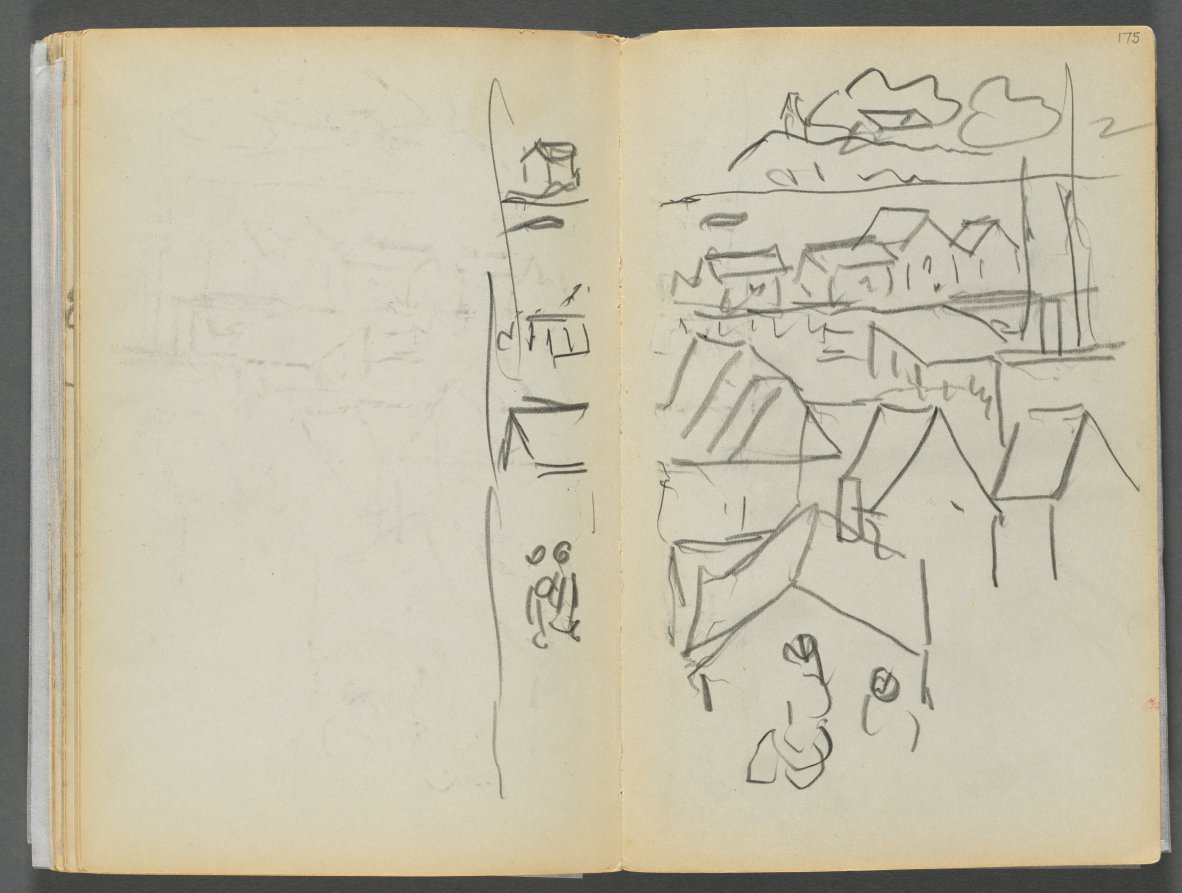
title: Sketchbook- The Granite Shore Hotel, Rockport, page 174 & 175: Houses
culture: America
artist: Maurice Prendergast (American, born Newfoundland [now Canada], 1858–1924)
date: 1905–10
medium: graphite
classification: Bound Volume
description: This sketchbook contains 72 pages of pencil drawings and 9 watercolors of Cape Ann. On the inside of the cover Prendergast wrote the address of the Granite Shore Hotel in Rockport, Massachusetts.